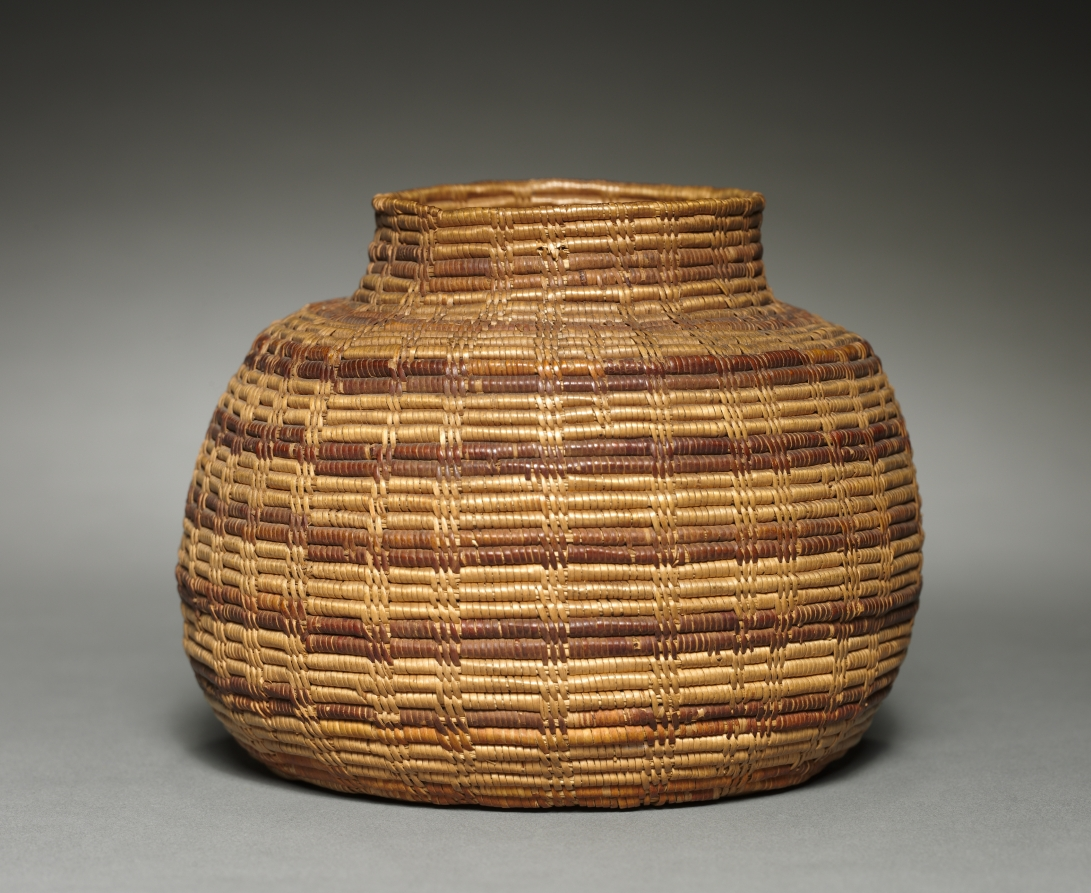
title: Jar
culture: California, Tübatulabal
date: 1895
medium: Sumac, yucca root; coiled, skip-stitch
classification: Basketry